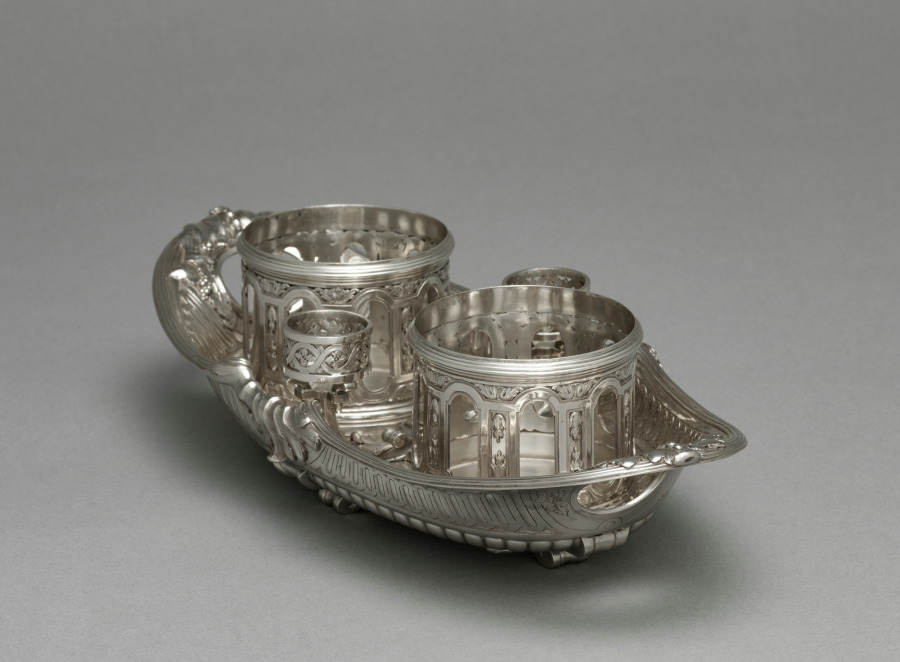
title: Cruet Stand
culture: France, 18th century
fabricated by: Robert Joseph Auguste (French, 1723–after 1795)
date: 1766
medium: silver and glass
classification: Silver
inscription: inscribed on base: R. J. Auguste Paris 1766.